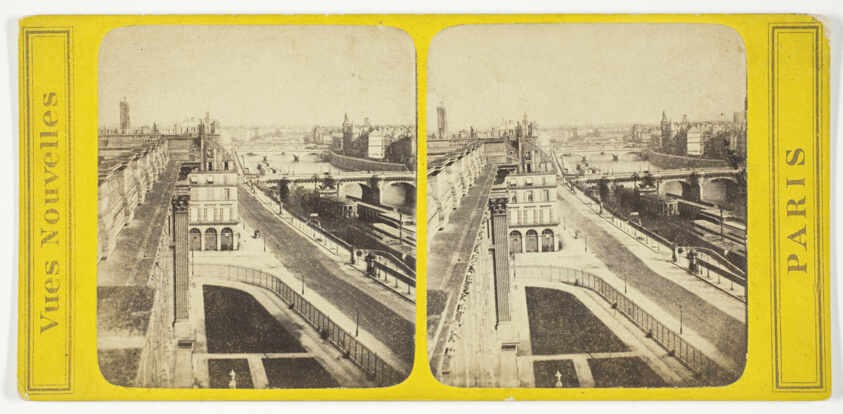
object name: Photograph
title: Panorama of Paris, Taken from the Louvre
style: 19th century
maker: Artist unknown; French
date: c. 1874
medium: Albumen print, stereo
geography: France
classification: photography; stereograph (albumen); albumen silver print; photographic process; photograph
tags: Paris